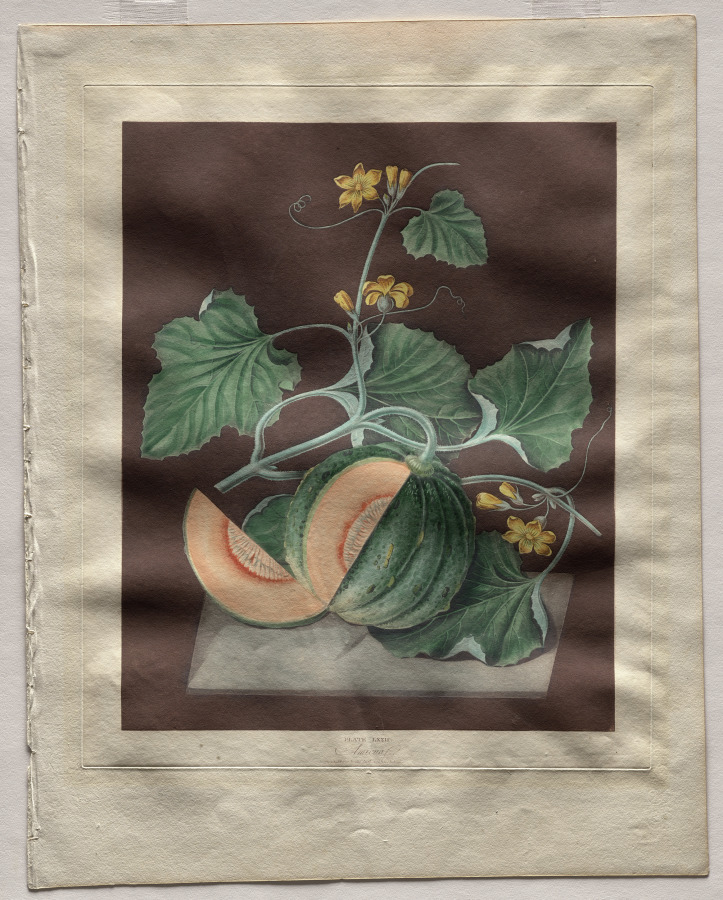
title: Pomona Britannica: No. 72 - Amicua (Melon)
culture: England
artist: George Brookshaw (British, 1751–1823)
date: published 1812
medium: aquatint and stipple engraving printed in color and hand colored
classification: Print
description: This color aquatint etching is one plate from George Brookshaw’s 1812 illustrated volume Pomona Britannica. Named after the Roman goddess of fruit trees, gardens, and orchards, Brookshaw intended the volume to be the English “country gentleman’s” guide to the science of classifying and identifying fruits (pomology). Many of Brookshaw’s models came from the Royal Gardens at Hampton Court and Kensington Gardens. Each print featured one fruit, often life-size, including detailed depictions of its flower and leaves. Printed in color with hand-painted highlights, this and other illustrated botanicals formed an essential part of the cultured English library in the early 19th century.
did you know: Originally from North Africa, melons are recorded in England as early as the 1500s.